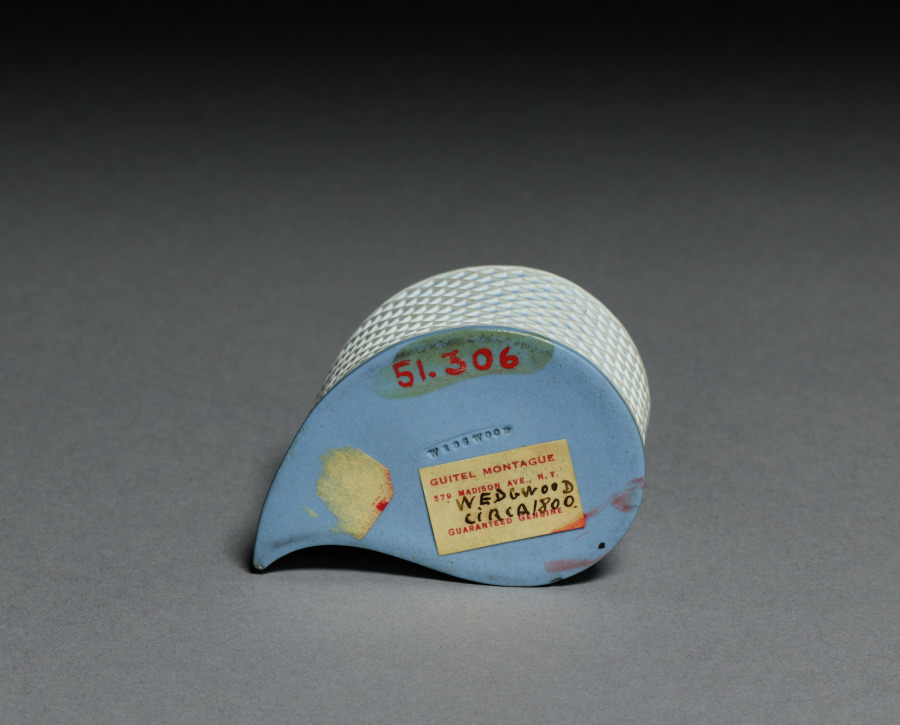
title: Custard Cup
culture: England, Staffordshire, 18th century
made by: Wedgwood Factory (British)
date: c. 1785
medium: jasper ware with relief decoration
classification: Ceramic